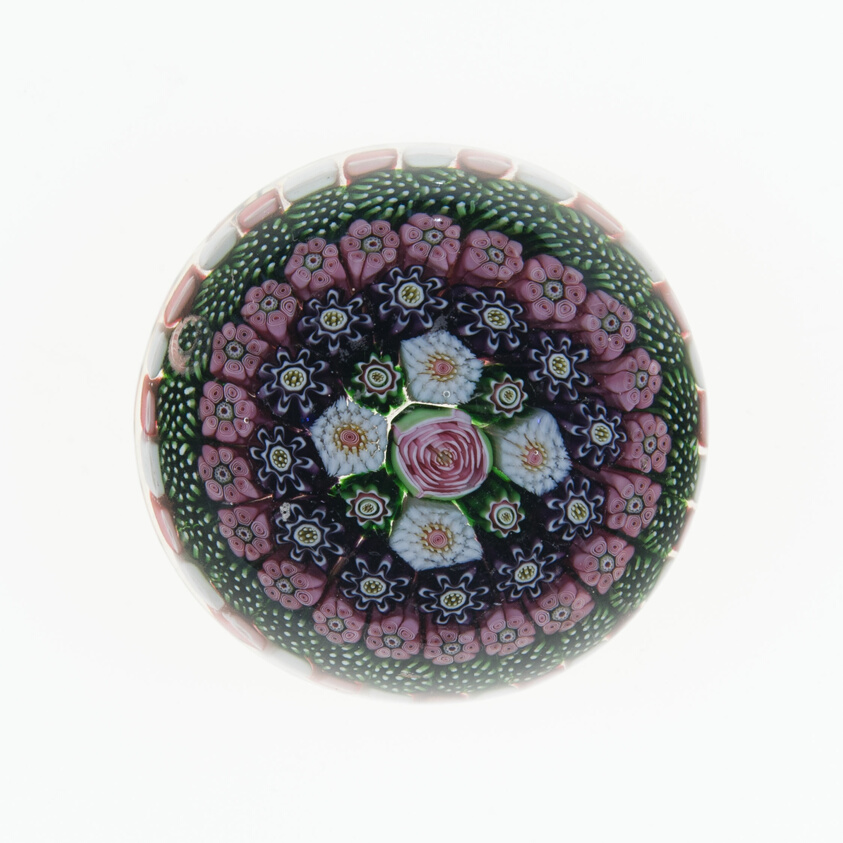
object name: Glass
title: Paperweight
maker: Clichy Glassworks (Cristalleries de Clichy); Clichy, France, 1837-1885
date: c. 1845/60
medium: Glass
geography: France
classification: paperweight; glass